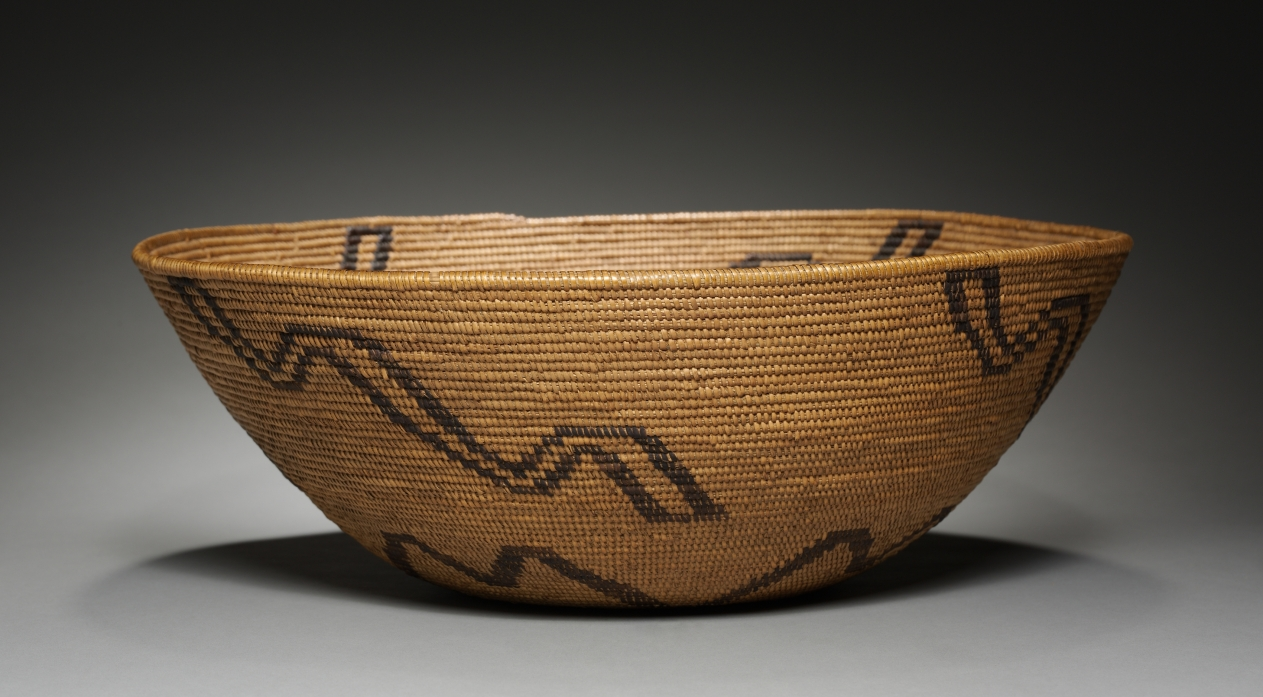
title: Food Bowl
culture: California, Southern, Gabrielino (San Gabriel, Mission or Tongva), Late 19th- Early 20th century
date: c 1875– 1925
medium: coiled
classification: Basketry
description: CMA Bulletin, December 1930